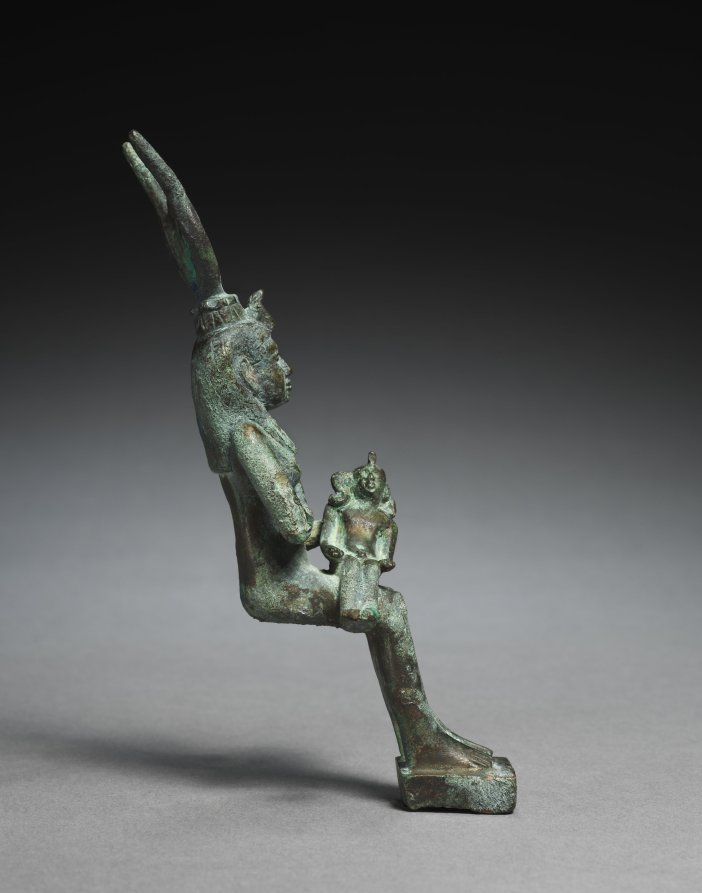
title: Statuette of Isis and Horus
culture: Egypt, Greco-Roman period (332 BCE–395 CE), Ptolemaic dynasty (305–30 BCE)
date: 305–30 BCE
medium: bronze, solid cast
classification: Sculpture